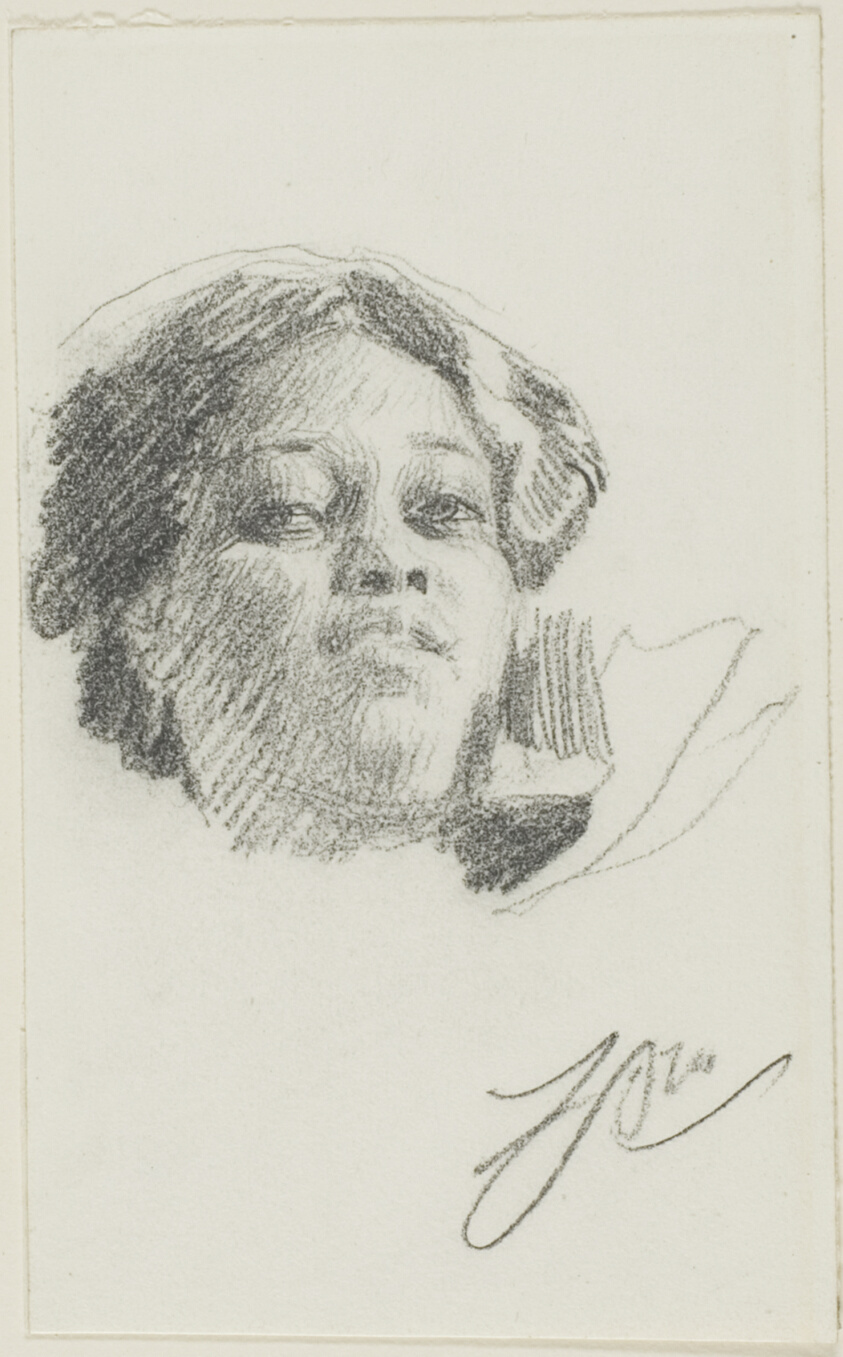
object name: Drawing and Watercolor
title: Head of a Woman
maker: Anders Zorn (Swedish, 1860-1920)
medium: Graphite on ivory wove paper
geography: Sweden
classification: graphite; drawings (visual works); prints and drawing